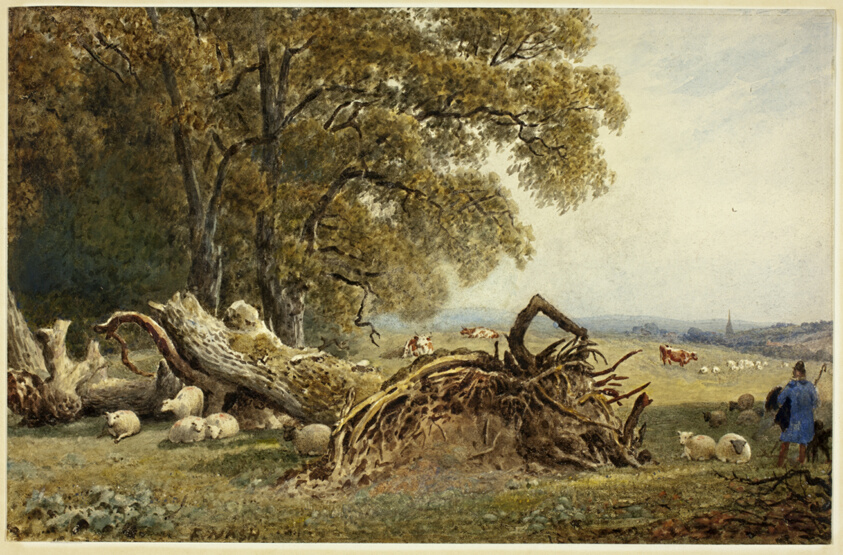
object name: Drawing and Watercolor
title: Sheep, Cows, and Herdsman by Uprooted Tree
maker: Nash, Frederick; English, 1782-1856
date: 1802/1856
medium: Watercolor over traces of graphite, on cream wove paper, laid down on board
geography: England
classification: watercolor; drawings (visual works); prints and drawing